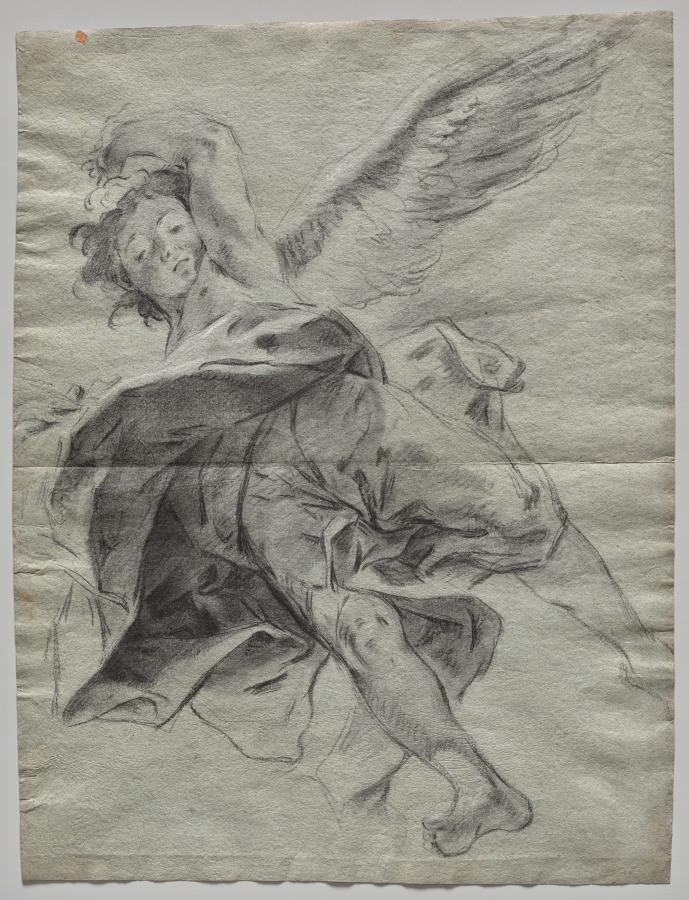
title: A Flying Angel (recto)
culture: Italy, Venice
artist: Giovanni Battista Piazzetta (Italian, 1682–1754)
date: 1723–27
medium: black chalk heightened with traces of white chalk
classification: Drawing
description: This drawing was completed in preparation for the most prestigious religious commission of Giovanni Battista Piazzetta’s career, the ceiling painting of the Glory of St. Dominic for the church of SS. Giovanni e Paolo in Venice. Both the finished painting, which depicts St. Dominic’s arrival in heaven amid a thundery vortex, and Piazzetta’s study for the angel, who carries St. Dominic on a cloud, depart from Venetian tradition. To execute this airborne subject, he likely drew from wax or clay models suspended in midair in order to study the illusionistic di sotto in su (from below to above) perspective and the play of light found on the angel’s shadowed form. He worked out the angel’s twisting pose, imbuing it with a lively sense of movement, and accentuated the drapery’s folds with heavy lines as though considering their visibility from afar. There are only slight changes in the angel’s pose between this drawing and the completed painting. As few of Piazzetta’s preparatory studies for paintings exist, Cleveland’s sheet offers rare insight to the artist’s working methods.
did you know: The Venetian blue paper (carta azzurra) of this sheet was the preferred medium for preparatory drawings among artists in Venice at the time this drawing was made.